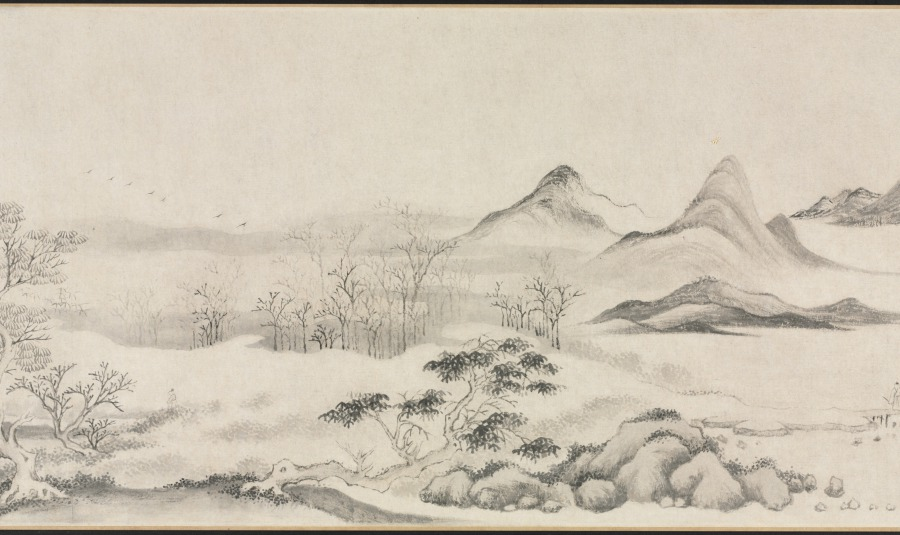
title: Water Village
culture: China, Ming dynasty (1368–1644)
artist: Wen Boren (Chinese, 1502–1575)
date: 1570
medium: handscroll; ink and light color on paper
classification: Painting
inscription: 隆慶庚午秋仿趙文敏筆. 五峰文伯仁 [印] 五峰山人; 文伯仁印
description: In the autumn of 1570, Wen Boren painted this seemingly unemotional scene of low-lying marshlands with a chain of rounded mountains in the background. A fishing boat is nestled on the shore near the village. Although paths and bridges traverse the landscape, only two people are visible in the stillness. From the restrained atmosphere of this landscape, one would never guess that Wen Boren was known as the “bad boy” of the Wu School for his explosive temper. As a younger man, he was even embroiled in a contentious lawsuit with his own uncle, Wen Zhengming (1470–1559), a master of Ming dynasty painting with whom he had trained. The ideal of the scholar-painter, or literati, was that an artist’s moral character is reflected in his paintings, so there was great incongruity between Wen Boren’s difficult personality and his restrained landscapes. A contemporary, Wang Shizhen, wrote this about him: "This gentleman is prone to behave odiously and screamed accusations at people. How is it possible for him to carry in his bosom such a wealth of scenic wonders?" Who knows what effort it took to subdue his fractious spirit to project an image of coolness and refined taste in his paintings?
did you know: A foreground tree has an eccentric twisting silhouette and pepper-dot "halo" of leaves.